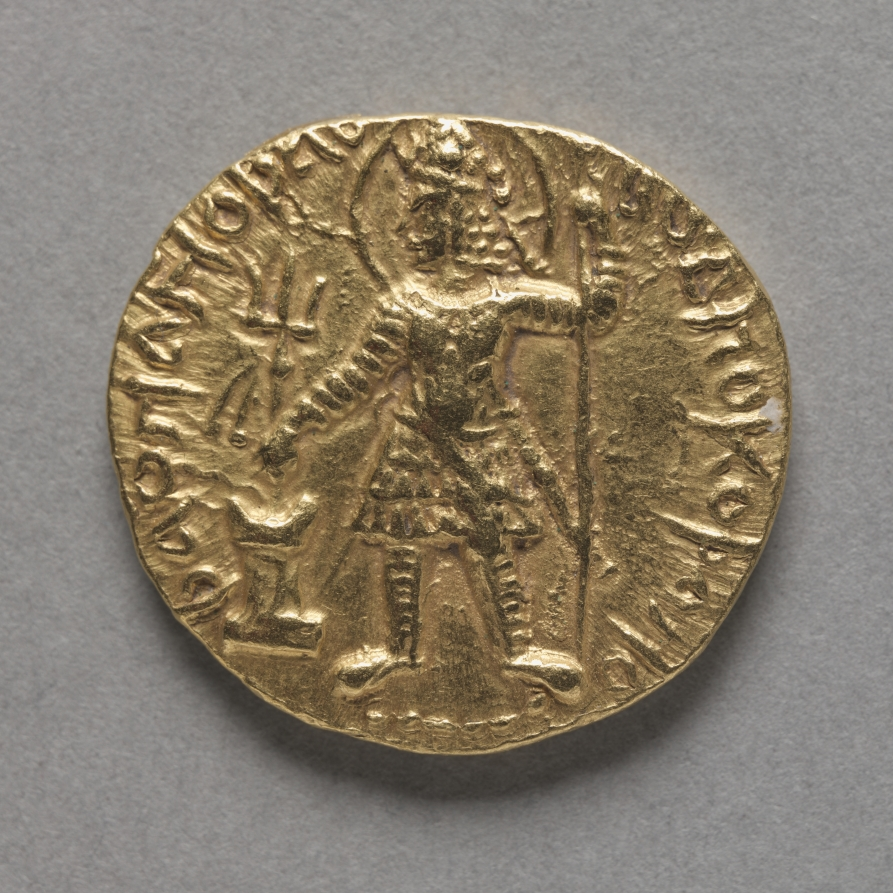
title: Coin of Kushan King Vasudeva I (obverse)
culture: India, Mathura, Kushan period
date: c. 142/145+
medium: gold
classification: Coins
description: This gold coin represents the reign of the Kushana ruler, Vasudeva I. The coin bears a portrait of the ruler on the obverse and various deities on the reverse. It is identified by inscriptions in Kharosthi, the language used in northwestern India during the Kushan period.